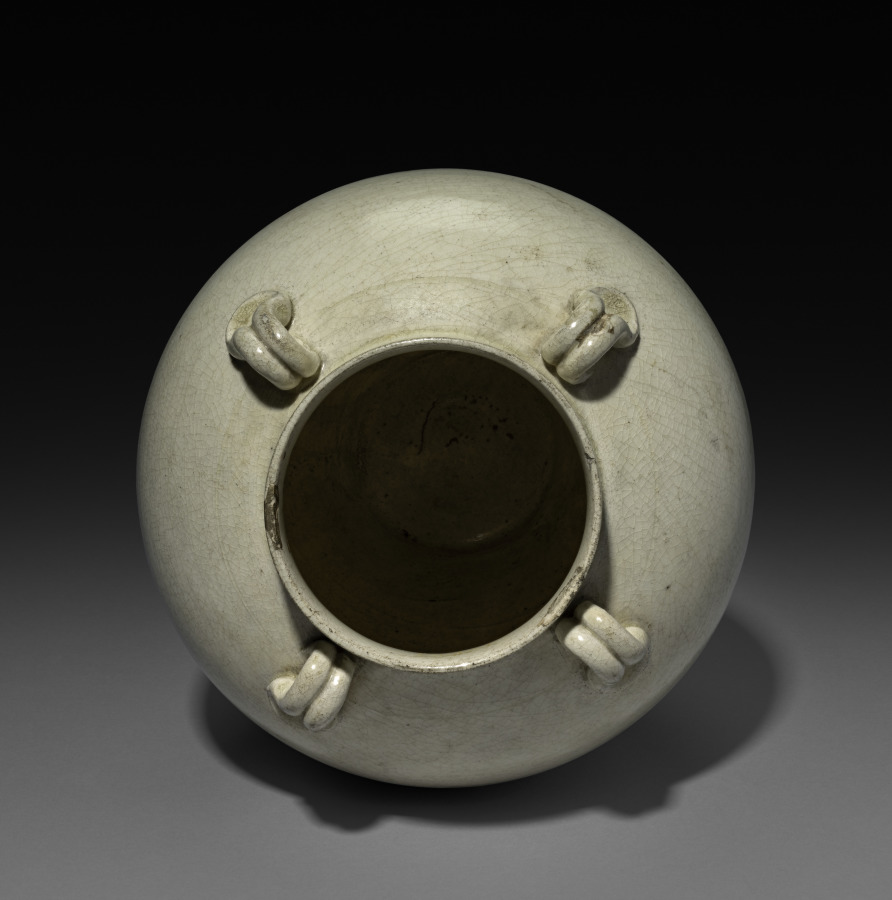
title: Jar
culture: China, Tang dynasty (618-907)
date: mid-600s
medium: glazed stoneware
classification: Ceramic